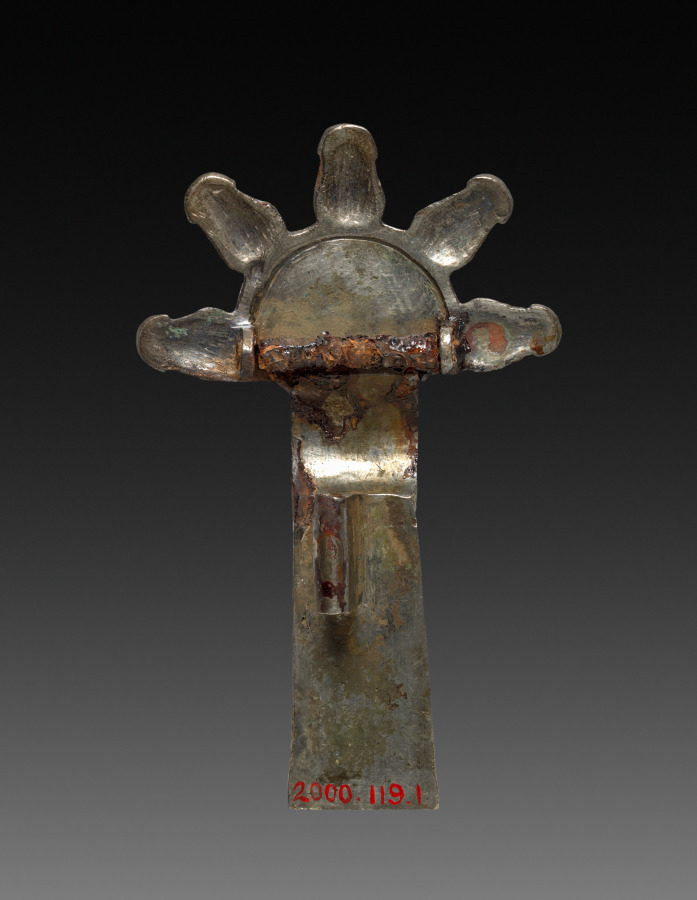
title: Fibulae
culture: Alemannic, Migration Period, 6th-7th century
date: 500s-600s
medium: cast silver, parcel-gilt, with niello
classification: Jewelry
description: A woman of high rank might have worn these twin fibulae on her shoulders, one fastening her inner garment on the right, the other her outer garment on the left. She might also have suspended them from her belt as decorative ornaments.